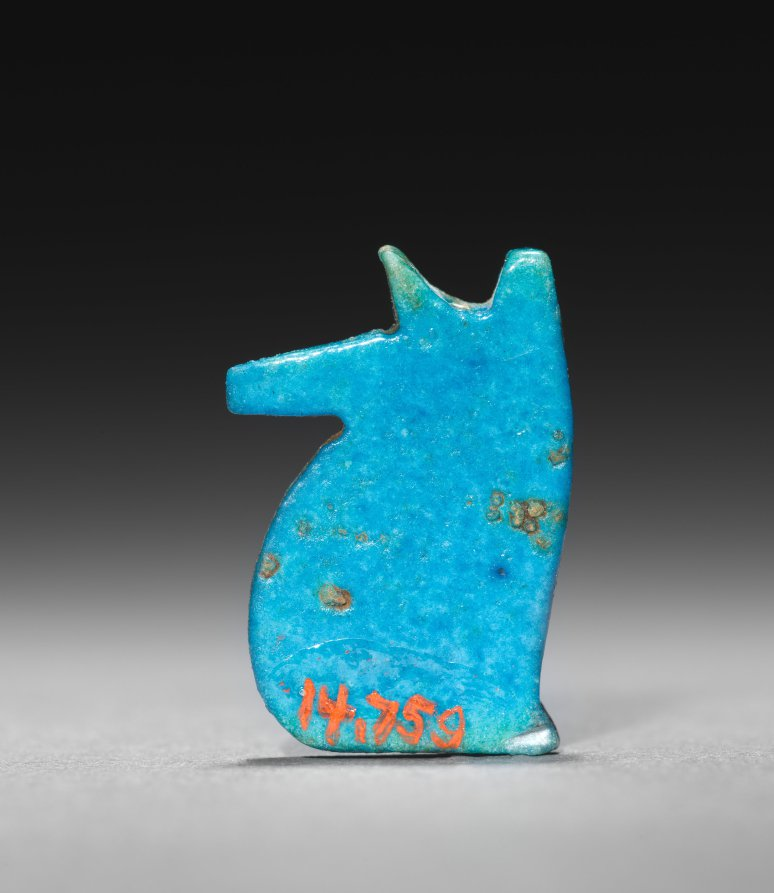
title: Eye of Horus Amulet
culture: Egypt, Third Intermediate (1069–715 BCE), Dynasties 22–25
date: 945–715 BCE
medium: turquoise faience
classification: Amulets